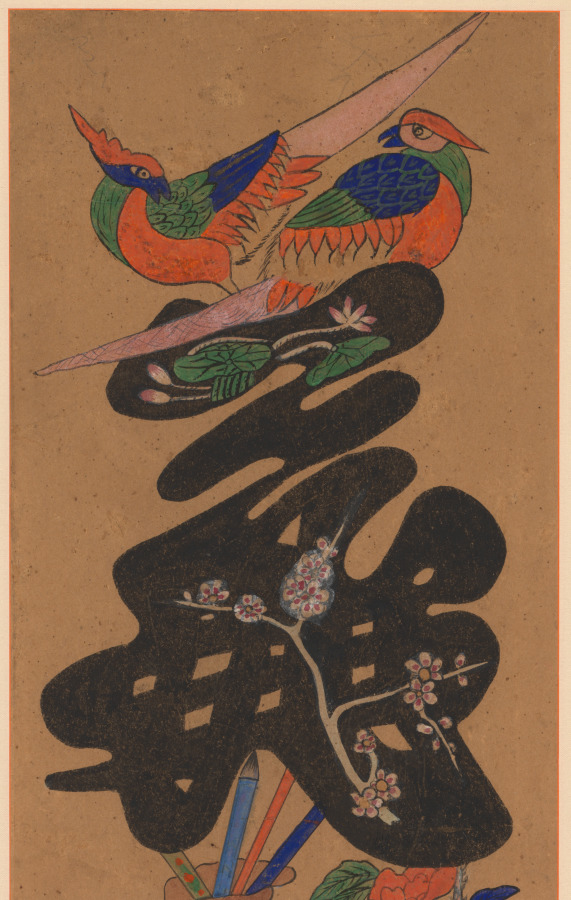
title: Munja-Chaekgeori Screen (Character-Books Screen)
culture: Korea, Joseon dynasty (1392–1910)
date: early 1900s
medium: Eight-panel folding screen, ink on paper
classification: Painting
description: This folding screen is a whimsical harmony of two different subjects: chaekgeori, or books and things; and munja, or characters. The lower section of each panel depicts the imagery of things, including books, decorative arts, and utilitarian objects. The upper portion of each panel bears a classical Chinese character. Read from far right to left, the eight characters refer to the values of Confucian teachings of the Joseon dynasty: filial piety, brotherly love, loyalty, trust, propriety, righteousness, modesty, and humility. While these two pictorial genres are harmoniously conjoined on the same picture plane, two sharply contrasting world views—urban consumerism and traditional Confucian ethics that despise materialism—compete with one another.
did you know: The eight Korean characters each mean filial piety, brotherly love, loyalty, trust, propriety, righteousness or justice, modesty or integrity, and humility or the feeling of shame.